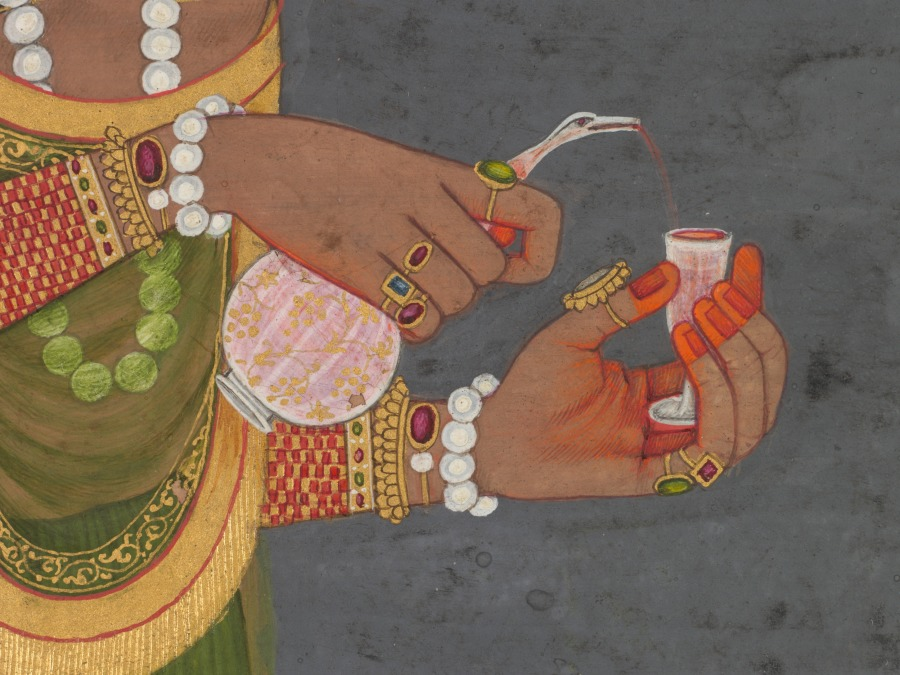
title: Court Lady Pouring Wine (recto)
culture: Mughal India, probably Lucknow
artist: attributed to Muhammad Rizavi Hindi (Indian, active mid-1700s)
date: c. 1760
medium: Gum tempera and gold on paper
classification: Painting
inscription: verso: Illuminated panel of Persian poetry in nast'aliq calligraphy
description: The artist has depicted a glass or crystal duck-headed decanter adorned with a gilded grapevine motif, signaling the contents. The red wine flows from the duck’s mouth into a tiny cup. Such bird-shaped wine vessels are vestiges of the blood sacrifices once part of ancient Persian court rituals. On the verso, floral sprigs illuminate the central calligraphic work, and paired verses have been written in smaller script all around the border. On this page, all the verses are about the beauty of—and longing for—the beloved.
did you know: The bird-headed decanter evokes blood rites of kingship in pre-Islamic Iran.